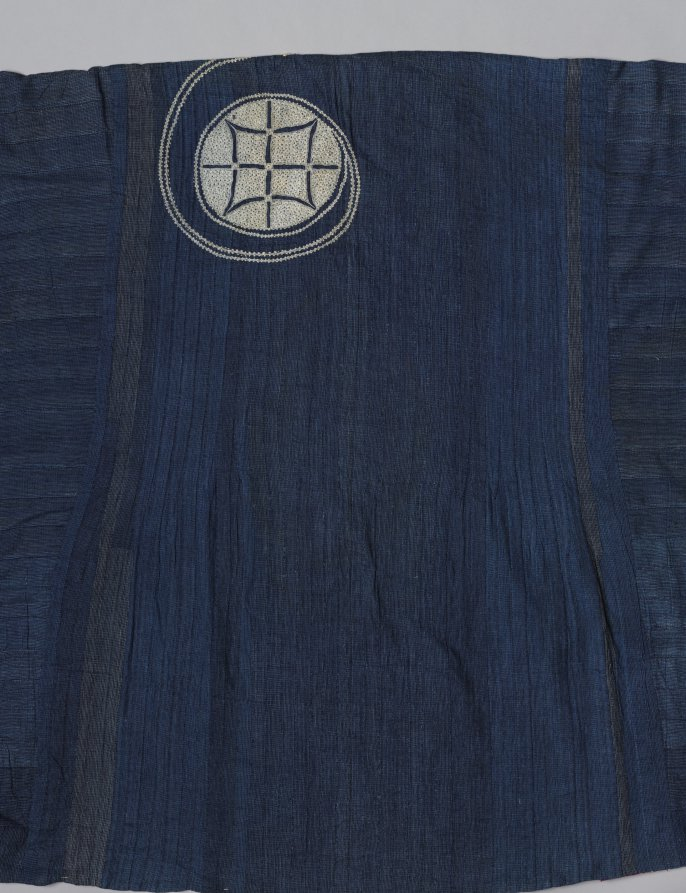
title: Prestige robe (riga)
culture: Africa, West Africa, Nigeria, probably Hausa-style or Nupe-style weavers and embroiders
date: late 1800s–by 1910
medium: Cotton, silk, and indigo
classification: Garment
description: Elite Nigerian men wore voluminous status garments variously called riga (Hausa), agbádá (Yorùbá), boubou (French), or mbubb (Wolof). Punctuated with white silk, this strip-woven riga’s inky blue was achieved by repeatedly dipping threads into indigo dye before weaving them. Embroiderers were often skilled Arabic calligraphers; the motifs here once had protective Islamic symbolism. The front pocket features the pointed “eight knives” (aska takwas) and a leaf (gambiya) associated with the Nupe peoples. At back, a spiral leads the wearer toward God. Magenta silk imported via trans-Saharan routes lines the hem. Rigan historically held transcultural appeal; today, they are pan-Nigerian male national dress.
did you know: Its owner's movements would have revealed a flash of magenta silk (an expensive trade good) along the hem of this riga, emphasizing his high status.